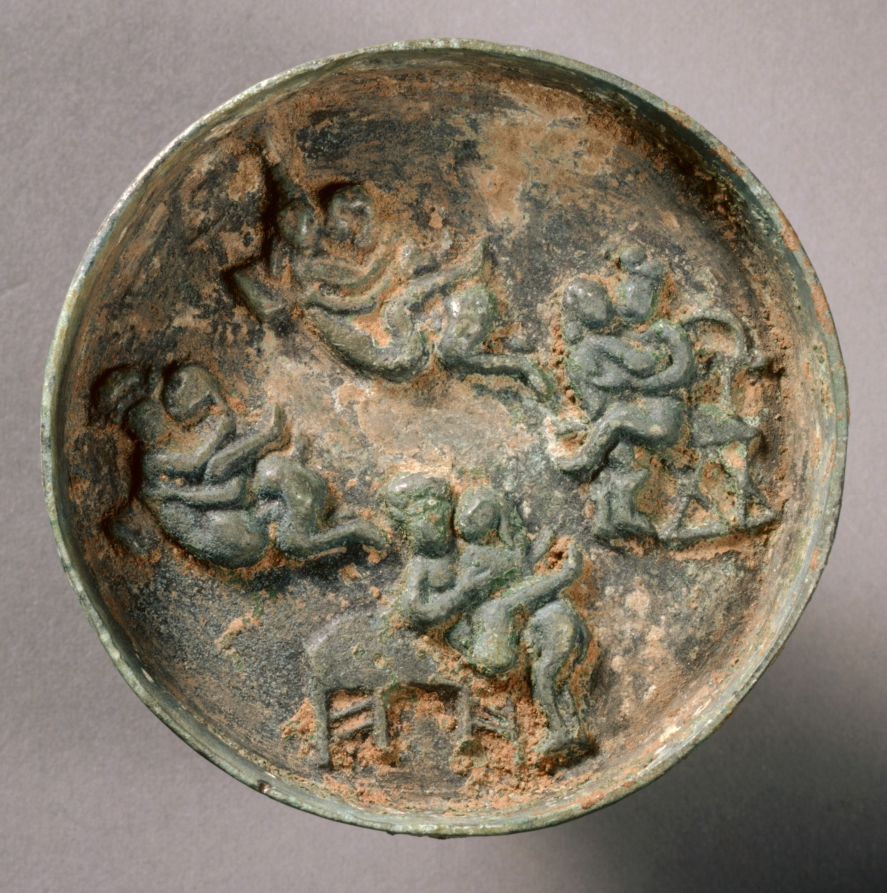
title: Small Erotic Mirror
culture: China, Yuan dynasty (1271-1368)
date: late 1200s–mid-1300s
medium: bronze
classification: Metalwork